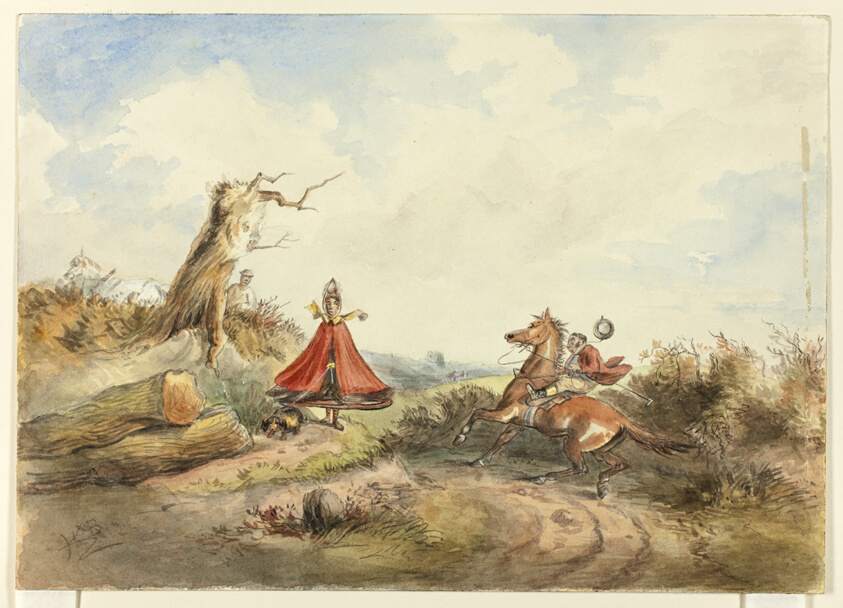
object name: Drawing and Watercolor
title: Horse with Rider Shying Away From Woman with Dog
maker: Hablot Knight Browne (English, 1815-1882)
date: c. 1860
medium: Watercolor, with pen and black ink, heightened with touches of white gouache, over graphite, selectively varnished, on ivory wove paper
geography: England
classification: watercolor; drawings (visual works); prints and drawing